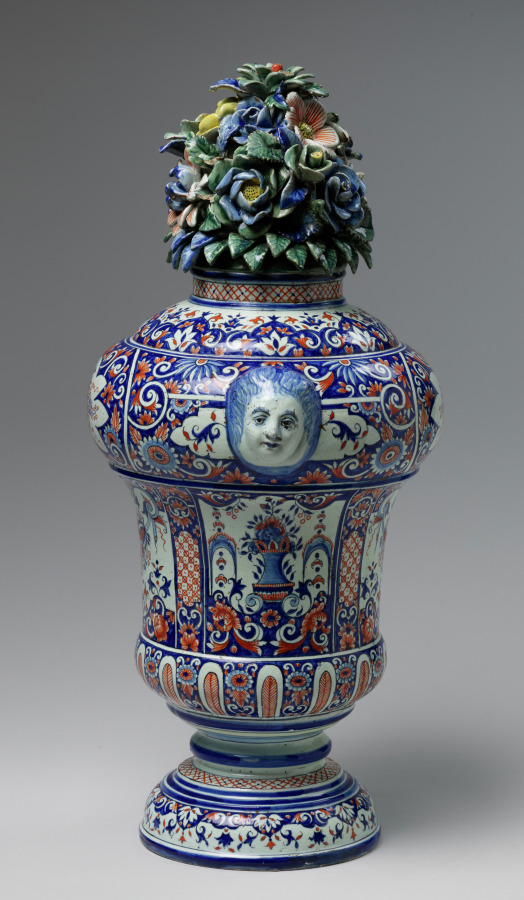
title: Vase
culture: France, Paris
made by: Samson & Co. (French)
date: early 1900s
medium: faience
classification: Ceramic